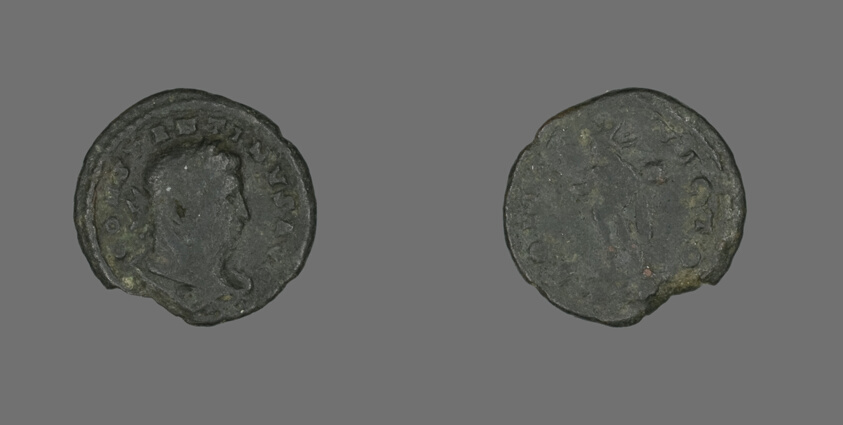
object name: Coin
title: Coin Portraying Emperor Constantine I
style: roman (ancient, style or period), ancient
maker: Roman, minted in Trier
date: 310-311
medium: Bronze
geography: Roman Empire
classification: coin; ancient art